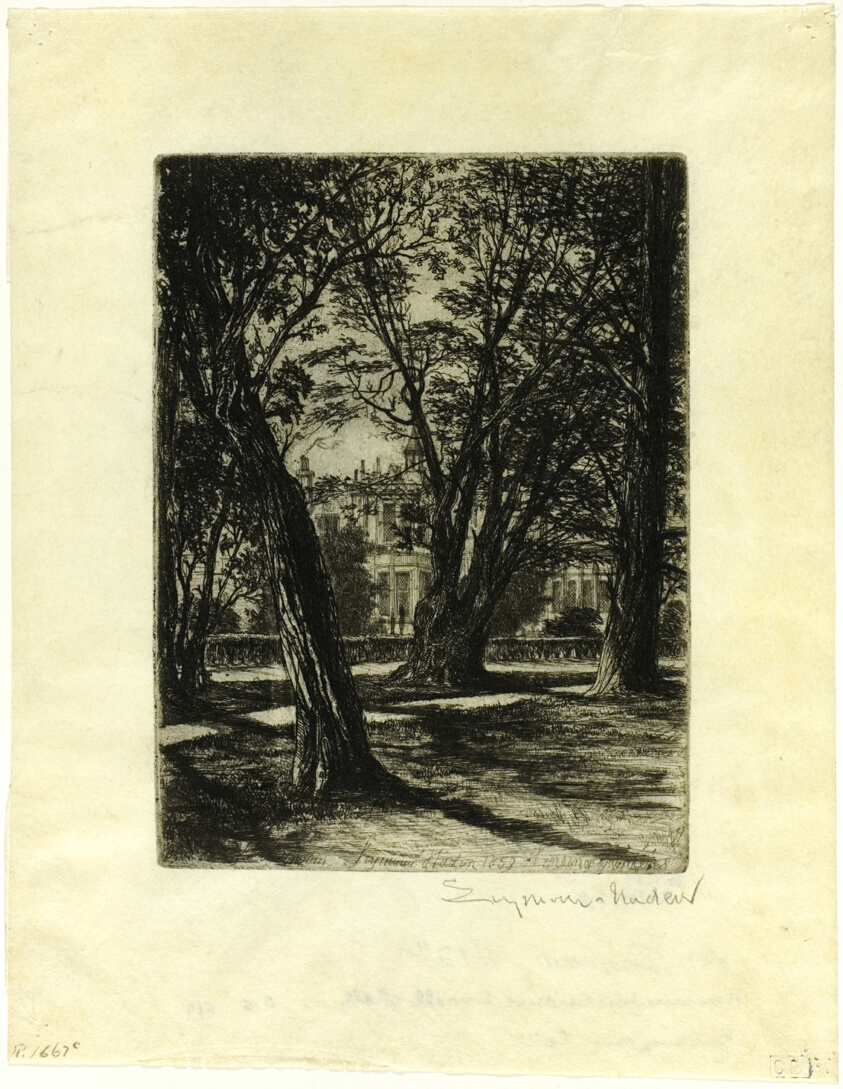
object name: Print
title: Kensington Gardens, No. I (small plate)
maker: Francis Seymour Haden (English, 1818-1910)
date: 1859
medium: Etching on ivory wove paper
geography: England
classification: etching; print; prints and drawing